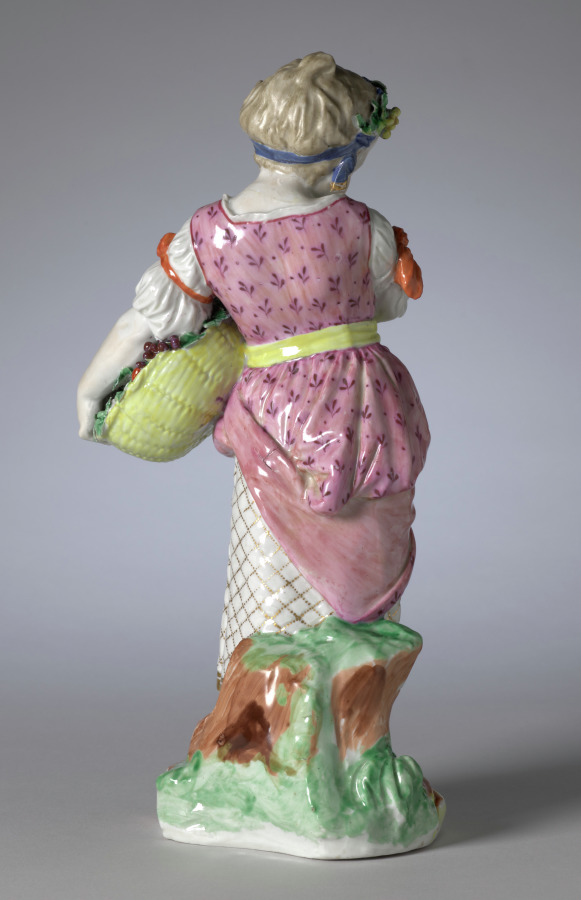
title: Figure of Autumn from the Four Seasons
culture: England, Bristol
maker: Bristol Porcelain Factory (British, 1770–81)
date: c. 1775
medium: hard-paste porcelain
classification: Ceramic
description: The modern notion of childhood as a time of innocence and simplicity emerged during the second half of the eighteenth century. This understanding of adolescence led to numerous depictions of children as personifications of the four seasons. Here autumn is portrayed as a young girl playfully jostling her overskirt as she balances a basket of fruit against her hip. The grapes, plums, and apples filling her basket allude to a plentiful fall harvest.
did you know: Allegorical figures most often decorated a table during the dessert course, providing amusing subjects for conversation.